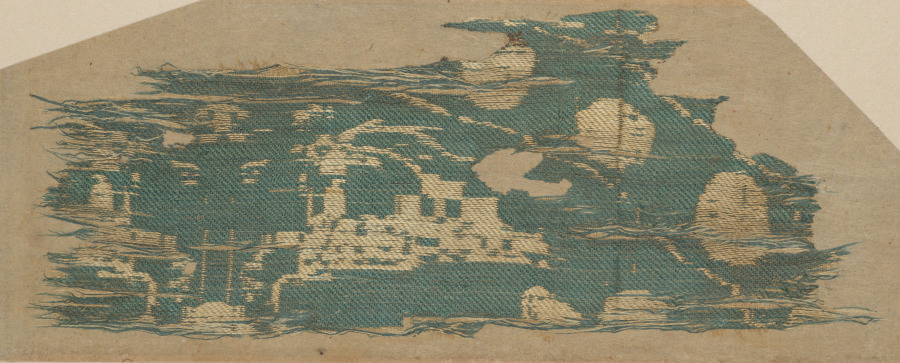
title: Fragment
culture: China, Tang dynasty (618-907)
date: 600–799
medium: silk, compound twill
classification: Textile